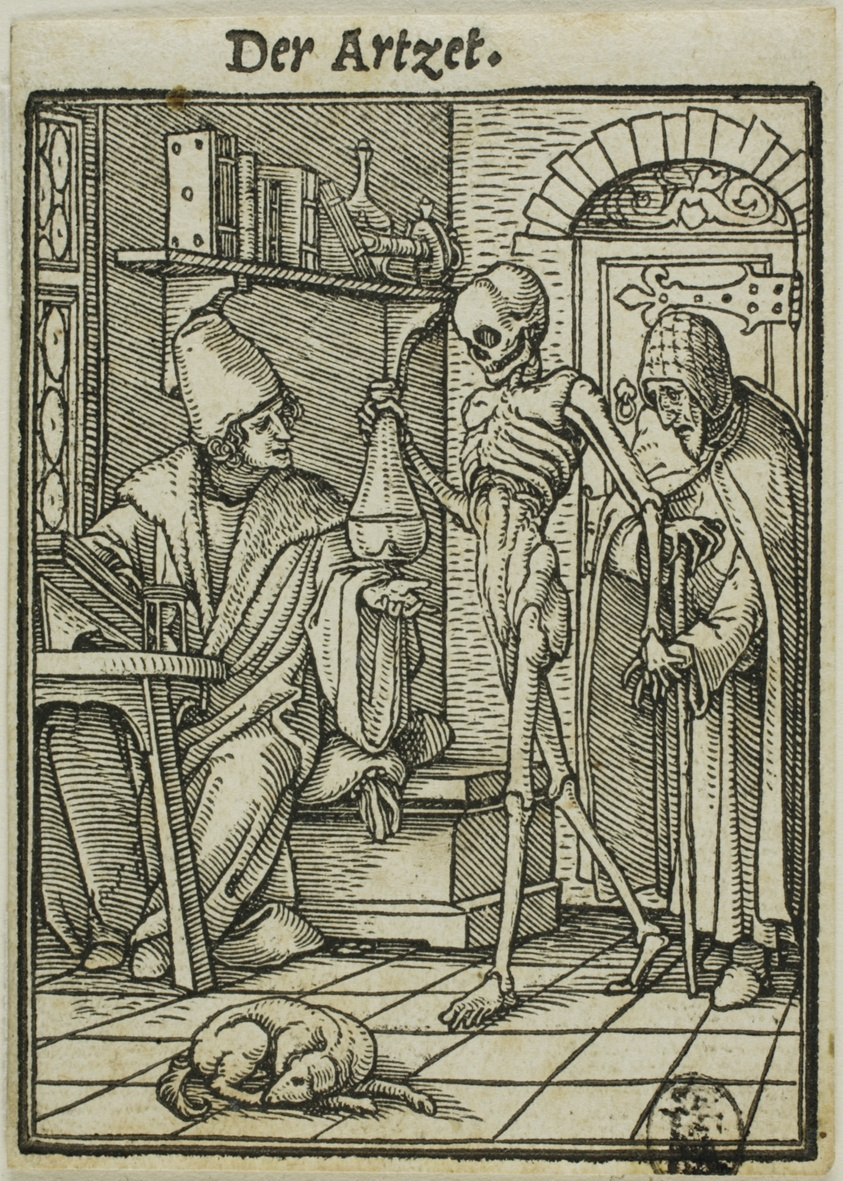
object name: Print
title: The Physician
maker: Hans Holbein, the younger (German, 1497-1543)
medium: Woodcut on paper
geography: Germany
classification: woodcut; print; prints and drawing